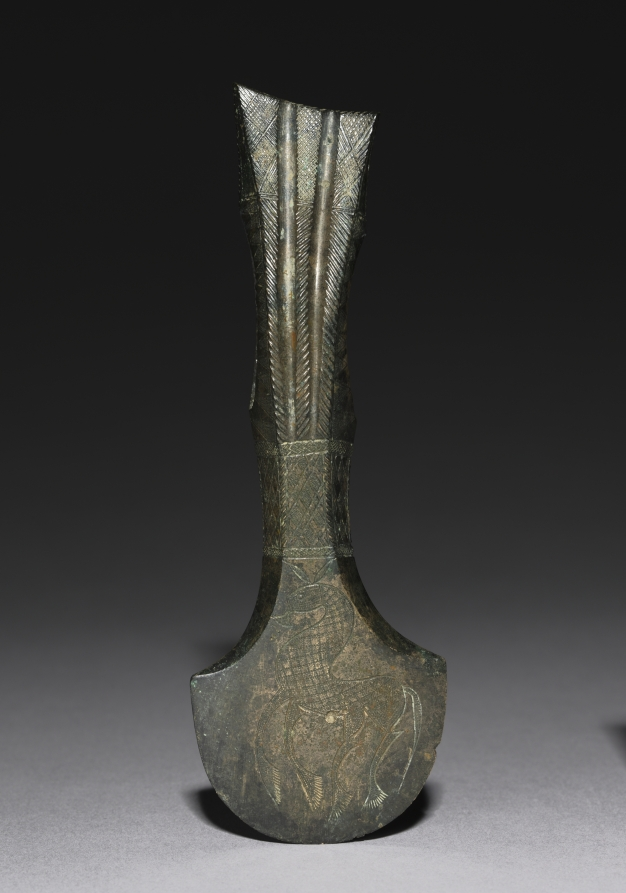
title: Axe Head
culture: Russia or Turkey, North-Central Caucasus, Kuban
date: 900–600 BCE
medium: bronze, cast in bi-part mold, polished, incised, and chased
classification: Metalwork